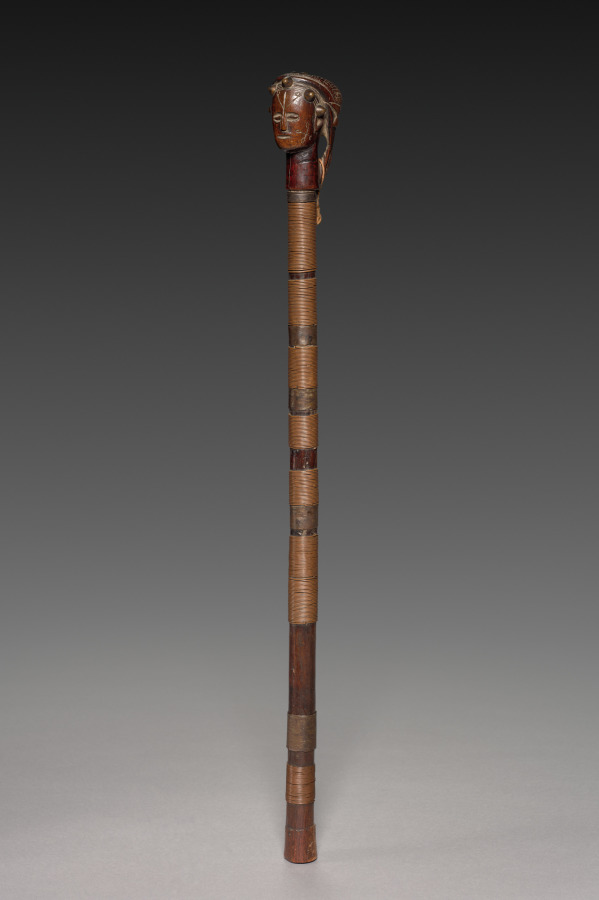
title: Scepter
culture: Africa, Central Africa, Angola, Ovimbundu-style maker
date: late 1800s or early 1900s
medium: Wood, copper alloy, upholstery studs, iron alloy, and cotton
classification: Implements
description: Staffs and scepters as well as tobacco pipes and mortars are among the most important sculptural creations to stem from the Ovimbundu peoples, a Central African culture. All of these object types have associations with ideas of class, status, and power. This scepter has a handle wrapped in thin copper wire that forms wide bands of alternating metal and wooden passages. Its finial is a human head whose carved headdress or hairstyle is ornamented with round-headed metal tacks.